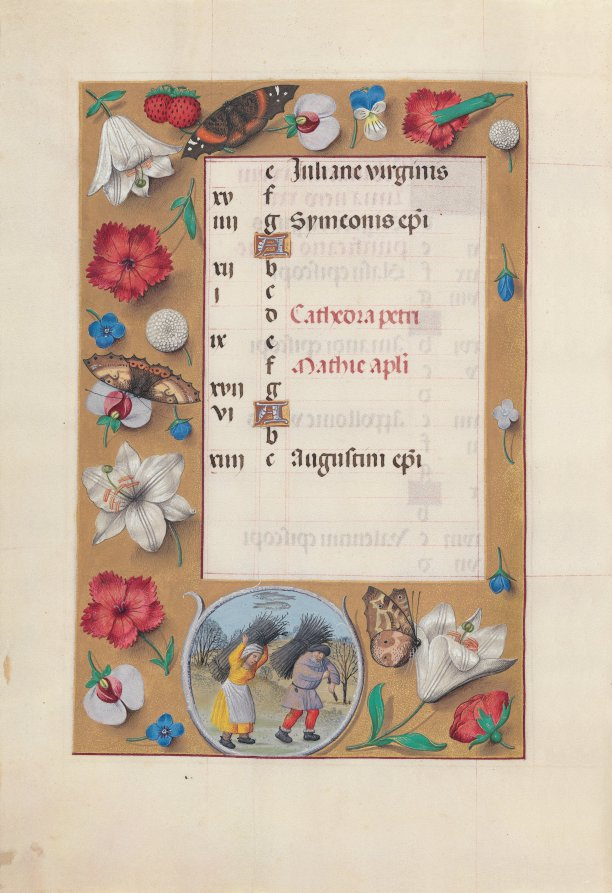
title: Hours of Queen Isabella the Catholic, Queen of Spain: Fol. 3v, February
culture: Flanders, Ghent and Bruges, late 15th century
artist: Master of the First Prayerbook of Maximillian (Flemish, c. 1444–1519)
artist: and Associates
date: c. 1500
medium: ink, tempera, and gold on vellum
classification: Bound Volume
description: This manuscript was illuminated by a circle of at least five highly organized manuscript painters active in the Flemish cities of Ghent and Bruges. The principal illuminator was Alexander Bening, who painted the majority of the book's miniatures. Manuscripts produced by this circle of artists are renowned for the decoration of their borders, which typically feature a rich variety of realistically painted flowers, birds, and butterflies. This prayer book, called a book of hours, was intended not for a cleric but for the private devotions of a lay person—in this case, Isabella the Catholic, Queen of Spain (1451–1504); her coat of arms embellishes the book's frontispiece. It is unlikely that the book was commissioned by the Queen herself; rather, she probably received it as a diplomatic gift from someone courting her patronage, perhaps Cardinal Francisco Jimenez de Cisneros. A Franciscan friar, Jimenez was dependent upon Isabella for his advancement, first to the post of Queen's confessor in 1492, and then to Archbishop of Toledo in 1495.